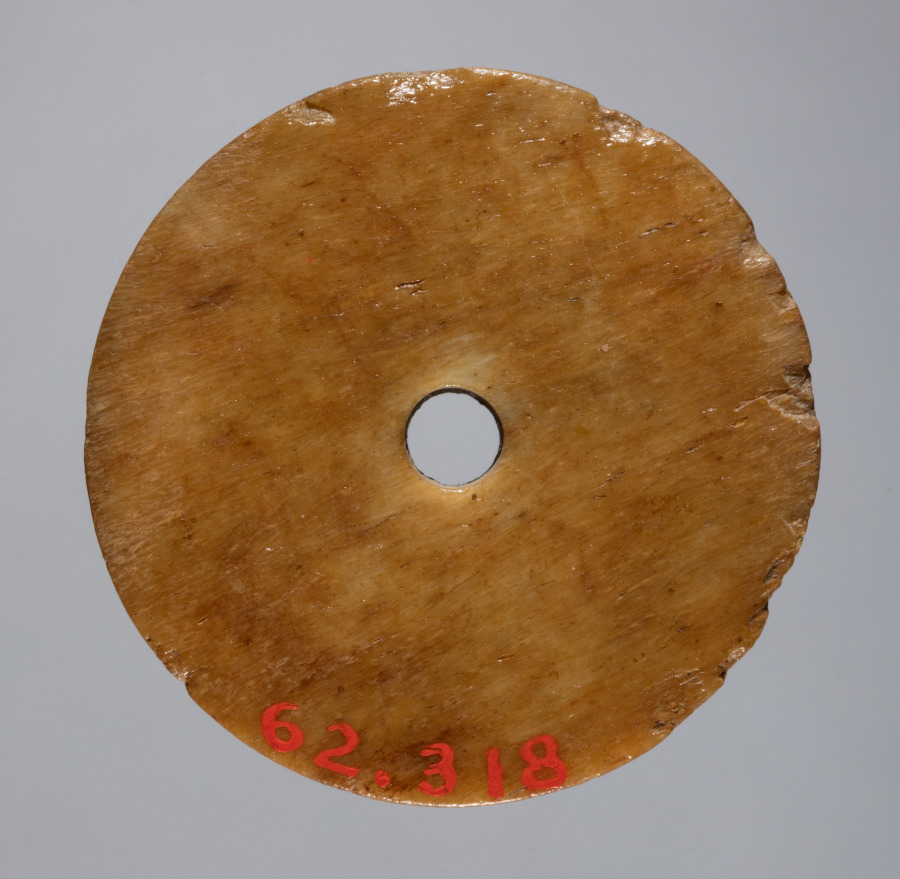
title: Spindle Whorl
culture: Iran, early Islamic period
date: 700s - 900s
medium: bone, incised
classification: Spindle Whorl